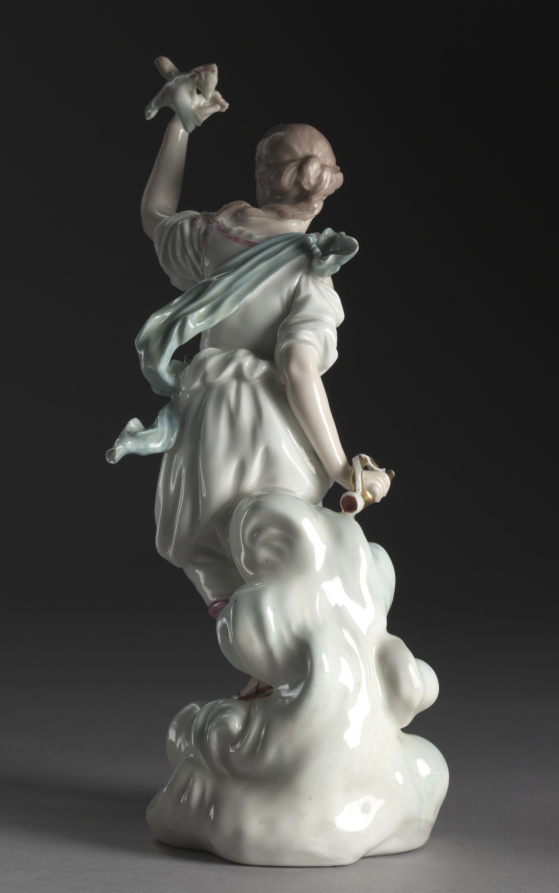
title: Air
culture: England, Derby, 18th century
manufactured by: Derby Porcelain Factory (Chelsea-Derby Period, 1770–84)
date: c. 1775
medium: soft- paste porcelain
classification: Ceramic